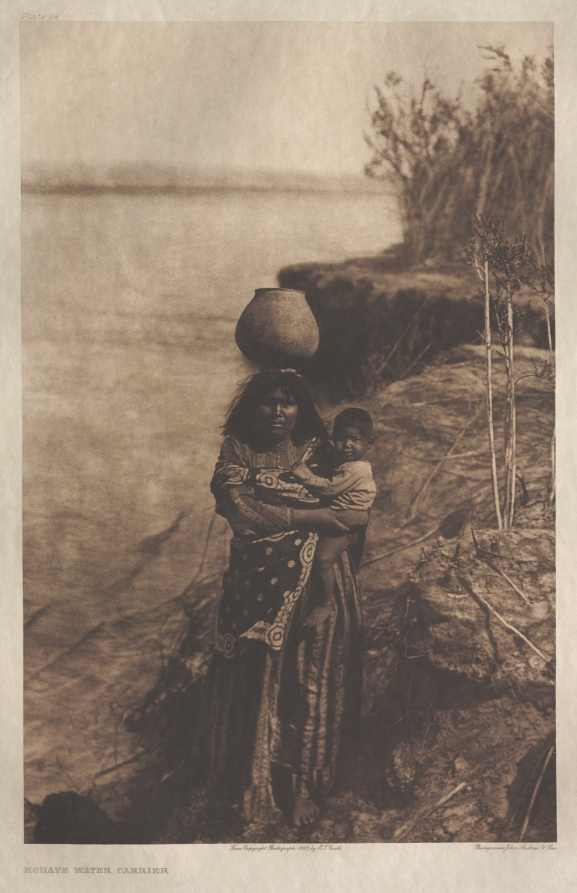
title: Portfolio II, Plate 58: Mohave Water Carrier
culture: America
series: The North American Indian: being a series of Portfolios picturing and describing the Indians of the United States, the Dominion of Canada, and Alaska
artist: Edward S. Curtis (American, 1868–1952)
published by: The University Press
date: 1903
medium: photogravure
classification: Portfolio